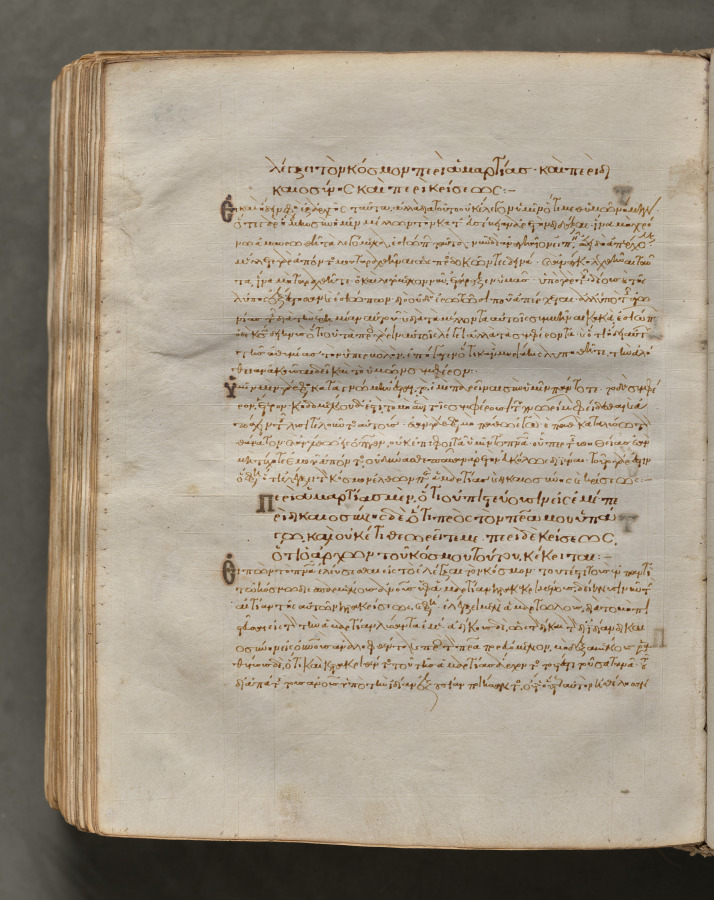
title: Text, folio 399 (verso), from a Gospel Book with Commentaries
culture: Byzantium, Constantinople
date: c. 1000–1100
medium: ink, tempera, and gold on vellum; leather binding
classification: Bound Volume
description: Each of the four gospels in this book opens on a page with brilliantly illuminated borders depicting the author of the text as well as birds—principally peacocks, symbols of the immortality of the soul—and fountains, representing the fountain of life and the salvation of the soul. This volume consists of 428 leaves with texts in Greek. Its level of sophistication suggests that it was probably written and decorated in a monastery in Constantinople.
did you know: Gospel books were carried in procession through Byzantine churches.